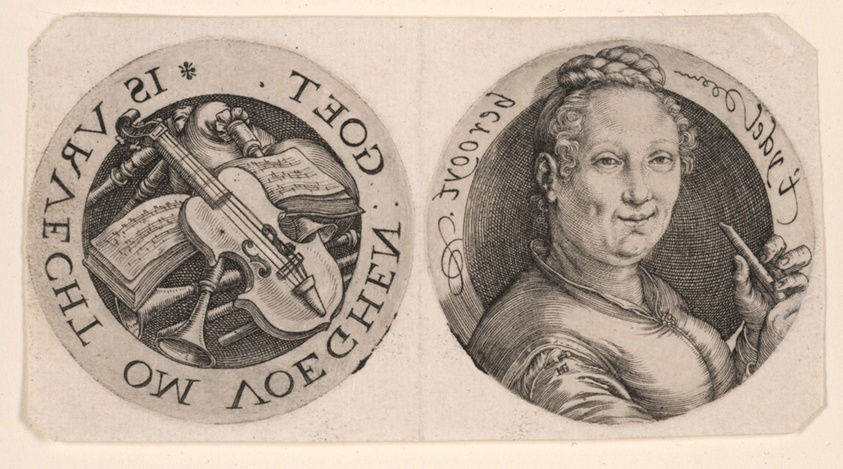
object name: Print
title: Bust of a Woman holding a Flute, and Musical Instruments, on one sheet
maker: Hendrick Goltzius (Dutch, 1558–1617)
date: 1580/90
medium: Engraving on paper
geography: Netherlands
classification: engraving; paper; print; prints and drawing